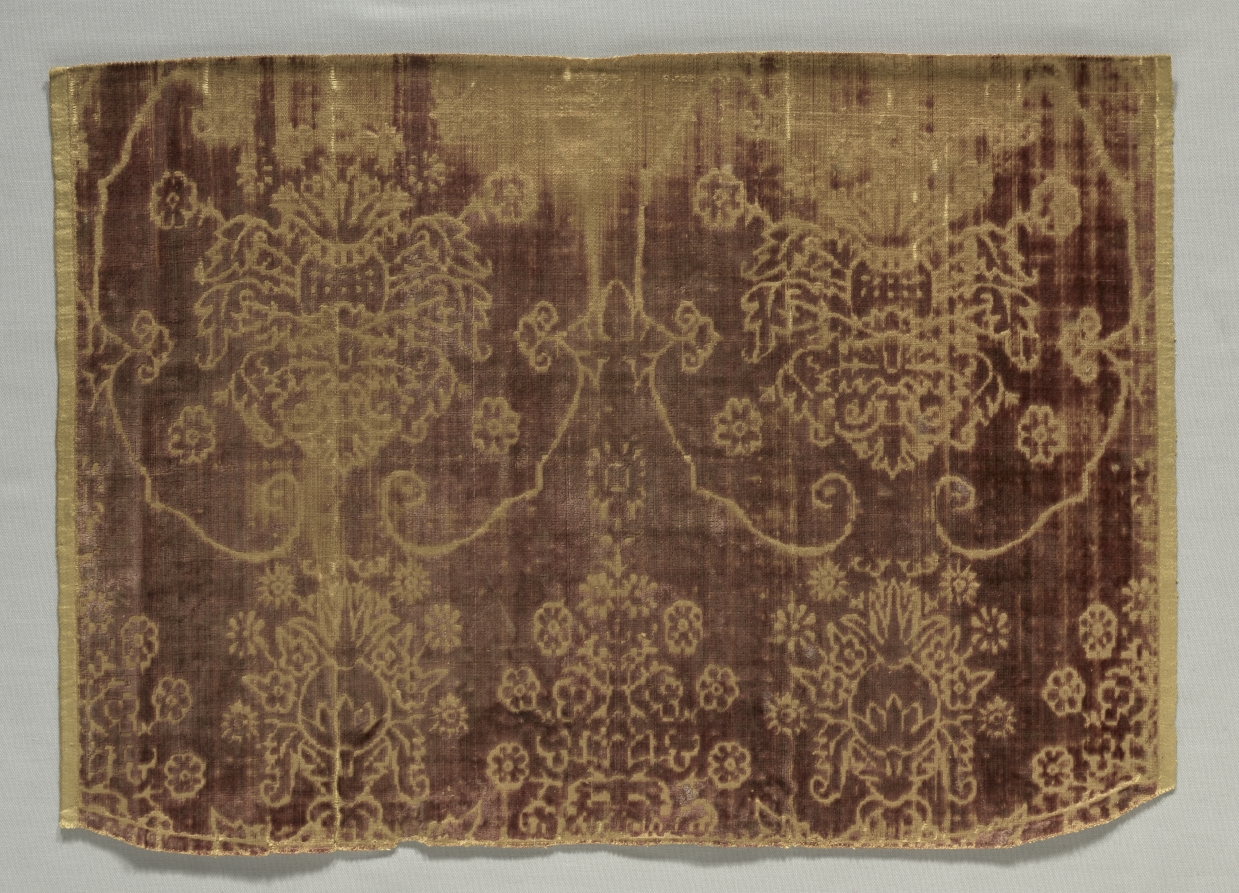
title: Velvet Fragment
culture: Italy, 15th century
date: 1400s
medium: velvet (cut and voided); silk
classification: Velvet